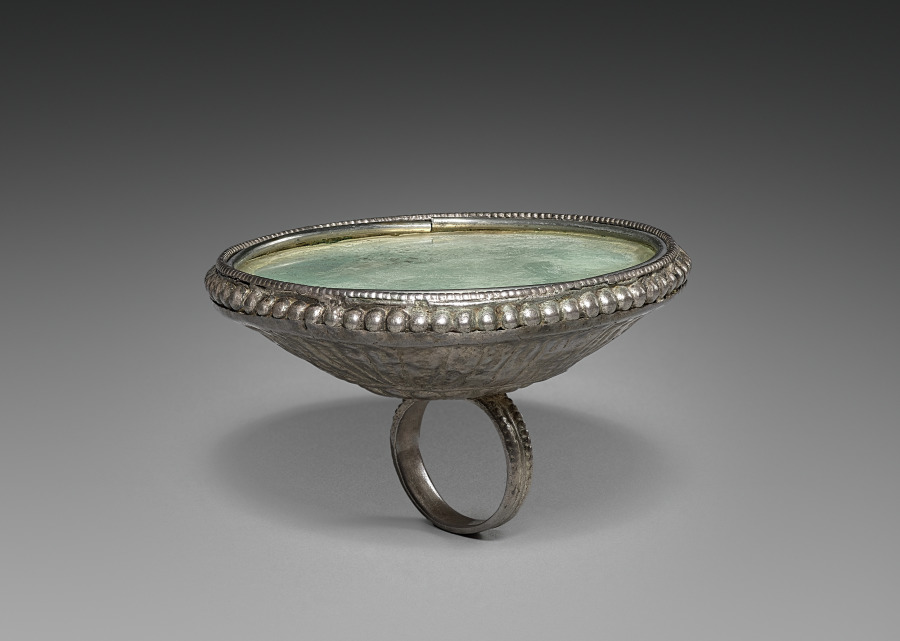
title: Thumb Ring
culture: India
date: 1800s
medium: silver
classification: Jewelry